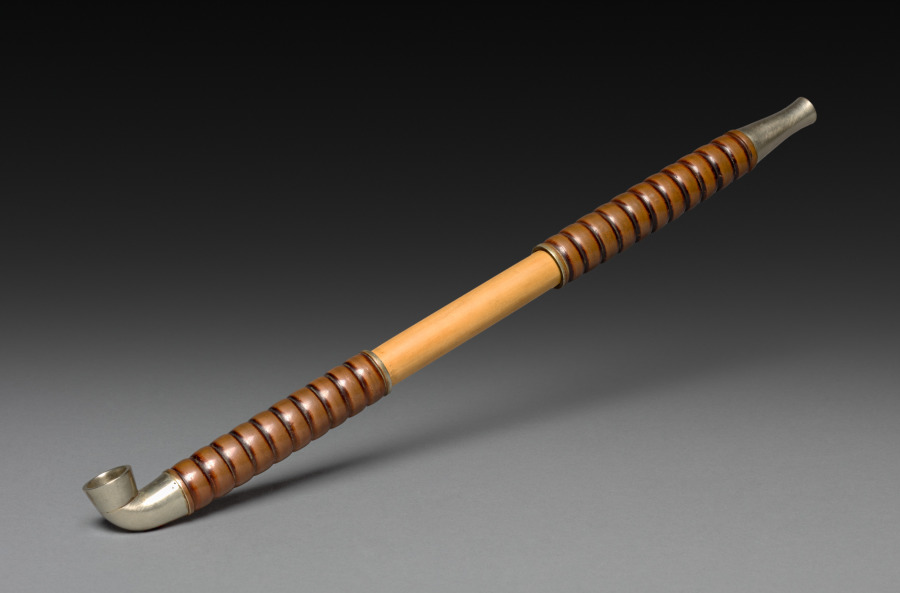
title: Tobacco Pipe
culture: Japan, Meiji period (1868–1912)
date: late 1800s–early 1900s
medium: bamboo, metal, silver/brass alloy, and copper (?)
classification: Miscellaneous